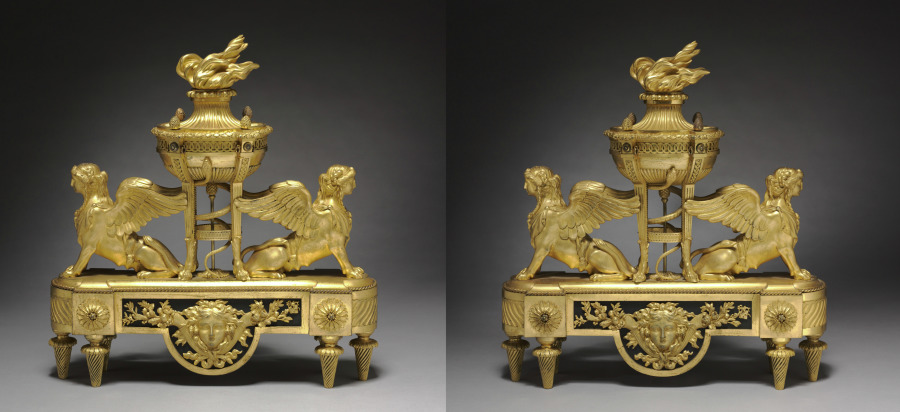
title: Pair of Firedogs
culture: France, 18th century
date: c. 1785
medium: gilt bronze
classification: Furniture and woodwork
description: Although Louis Jean Desprez’s design was largely inspired by tombs in southern Italy, he added sphinxes in his print Tomb with Sphinx due to his fascination with ancient Egypt. Ancient Egyptians saw the sphinx, a half-human, half-lion mythological creature, as a protector of tombs and temples. The pair of andirons, decorative supports for a hearth’s firewood, alongside Tomb with Sphinx, highlight the growing interest in Egyptomania during the 1700s. Interestingly, the andirons portray ancient Greek and Roman interpretations of the sphinx. Most Europeans learned of ancient Egypt by studying Egyptomania in ancient Roman and Greek art and architecture or Egyptian antiquities brought over by the Romans.